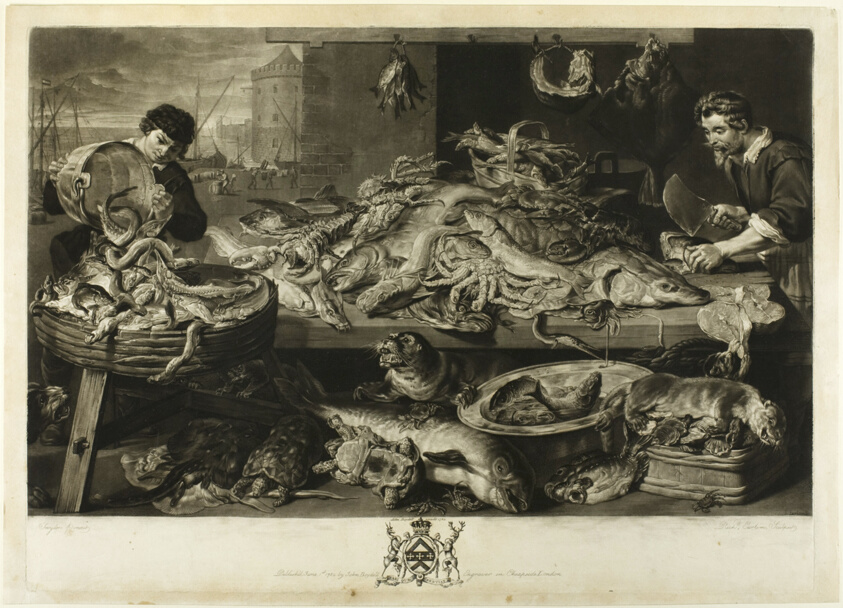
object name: Print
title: A Fish Market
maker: Richard Earlom (British, 1743-1822); after Frans Snyders (Flemish, 1579-1657)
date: published June 1, 1782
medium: Mezzotint on paper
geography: England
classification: mezzotint; print; prints and drawing